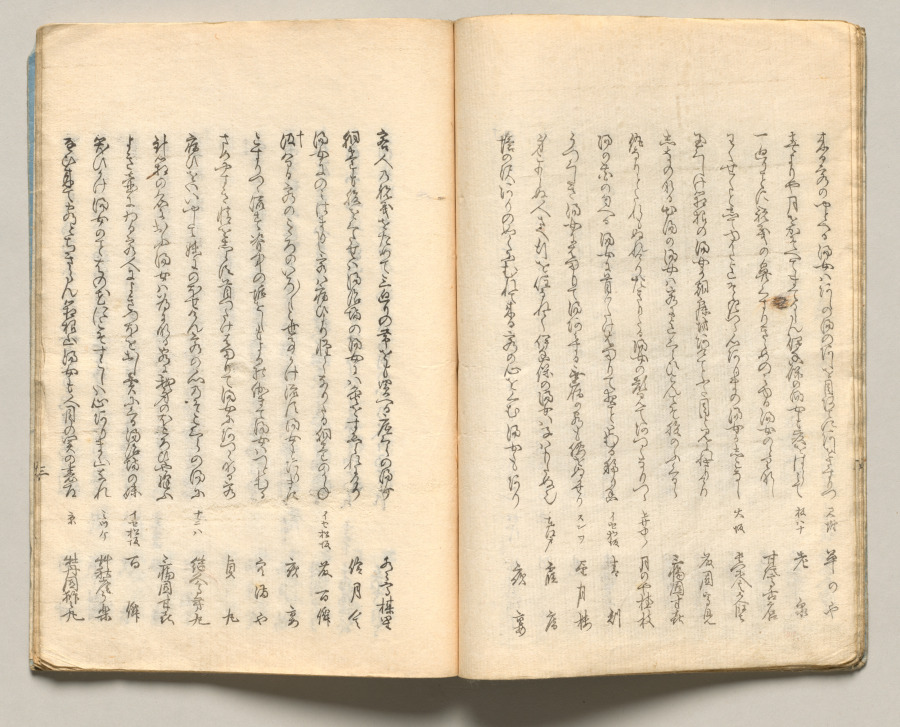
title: Spread Ten from Volume Six of People of Japan in Light Verse (Kyōka)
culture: Japan, Edo period (1615–1868)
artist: Utagawa Hiroshige (Japanese, 1797–1858)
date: 1857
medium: Woodblock-printed book; ink and color on paper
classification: Bound Volume